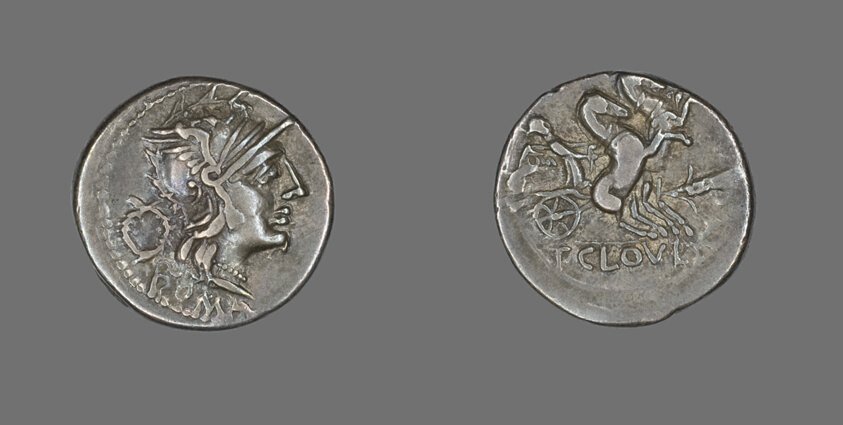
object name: Coin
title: Denarius (Coin) Depicting the Goddess Roma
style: roman (ancient, style or period), ancient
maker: Roman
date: 128 BCE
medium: Silver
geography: Roman Empire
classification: coin; ancient art